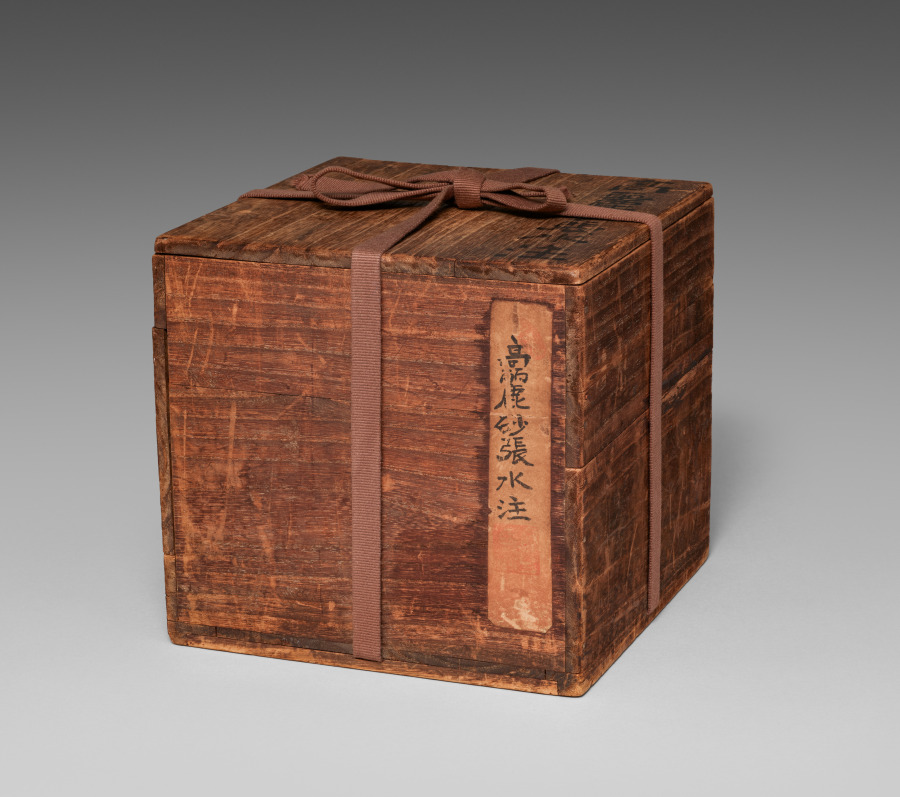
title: Celadon Bowl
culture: Korea, Goryeo dynasty (918–1392)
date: 1200s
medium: Celadon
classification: Ceramic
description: As early as the seventh century, the practice of drinking tea and wine became an important part of elite leisure culture in Korea. A wide bowl like this example was especially suitable for drinking powdered tea shaved from a compressed tea cake, the most commonly enjoyed type during the Goryeo period.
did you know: Crackling occurs when the glaze contracts more rapidly than the clay body during the firing process. In the context of celadon bowls, this phenomenon is not regarded as a flaw but rather as a highly valued aesthetic feature—one that evokes a sense of age.